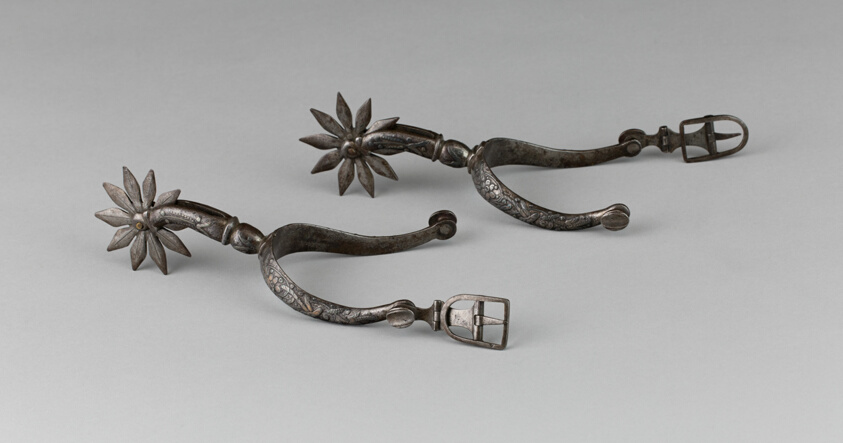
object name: Armor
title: Pair of Spurs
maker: North European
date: early 17th century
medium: Iron and silver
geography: Europe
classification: horse equipment; armor; arms and armor